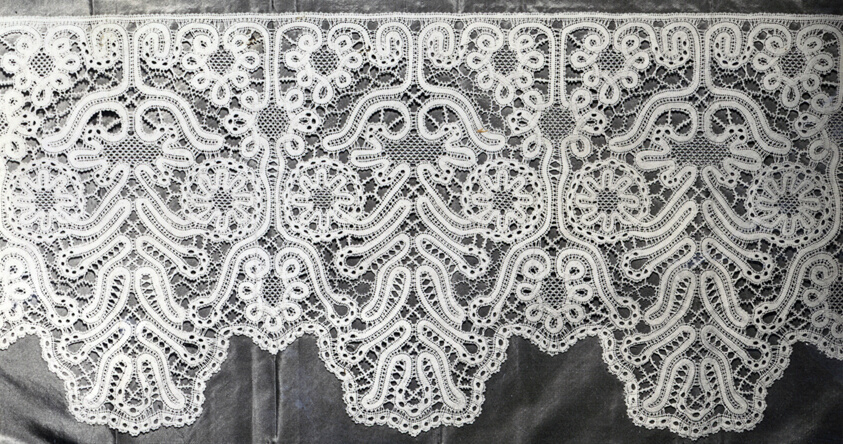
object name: Textile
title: Flounce or Border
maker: Germany, Hungary or Yugoslovia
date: 1850/1900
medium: Linen, bobbin part lace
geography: Germany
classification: textile; lace - bobbin